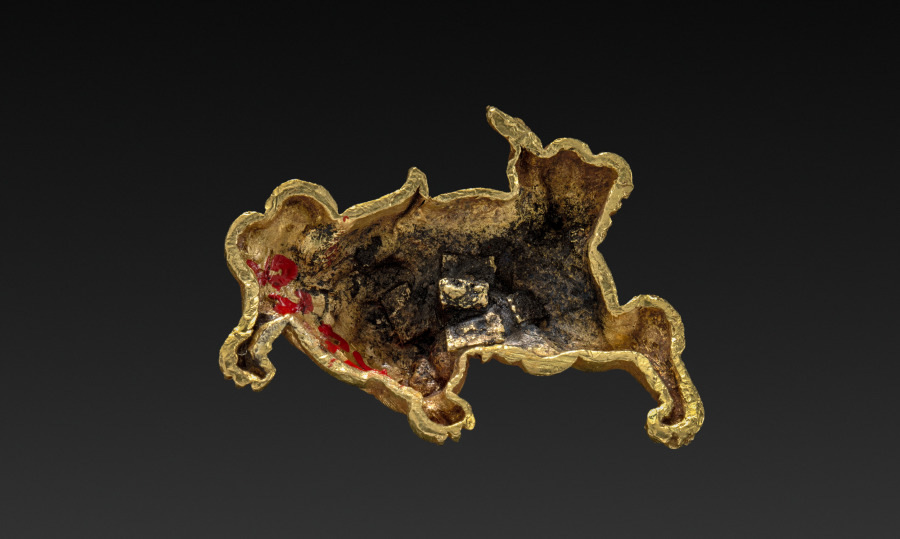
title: Lion-shaped Sword-Grip Ornament (Menuki)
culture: Japan, possibly Edo period (1615-1868)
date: c. 1615–1868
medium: gilt bronze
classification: Metalwork